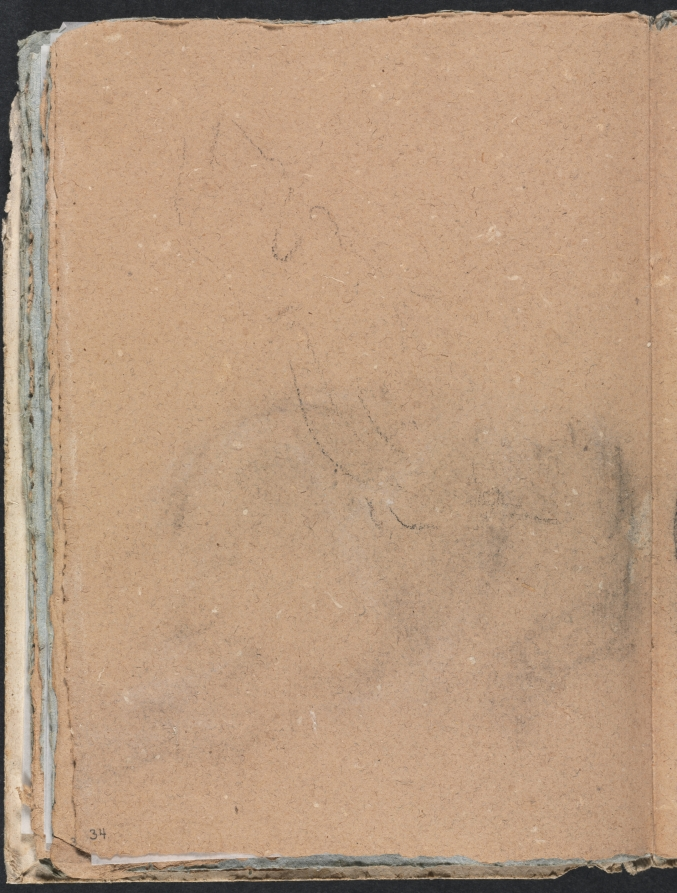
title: Verona Sketchbook: Indecipherable form (page 34)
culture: Italy, 18th century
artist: Francesco Lorenzi (Italian, 1723–1787)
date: 1760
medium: black chalk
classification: Bound Volume